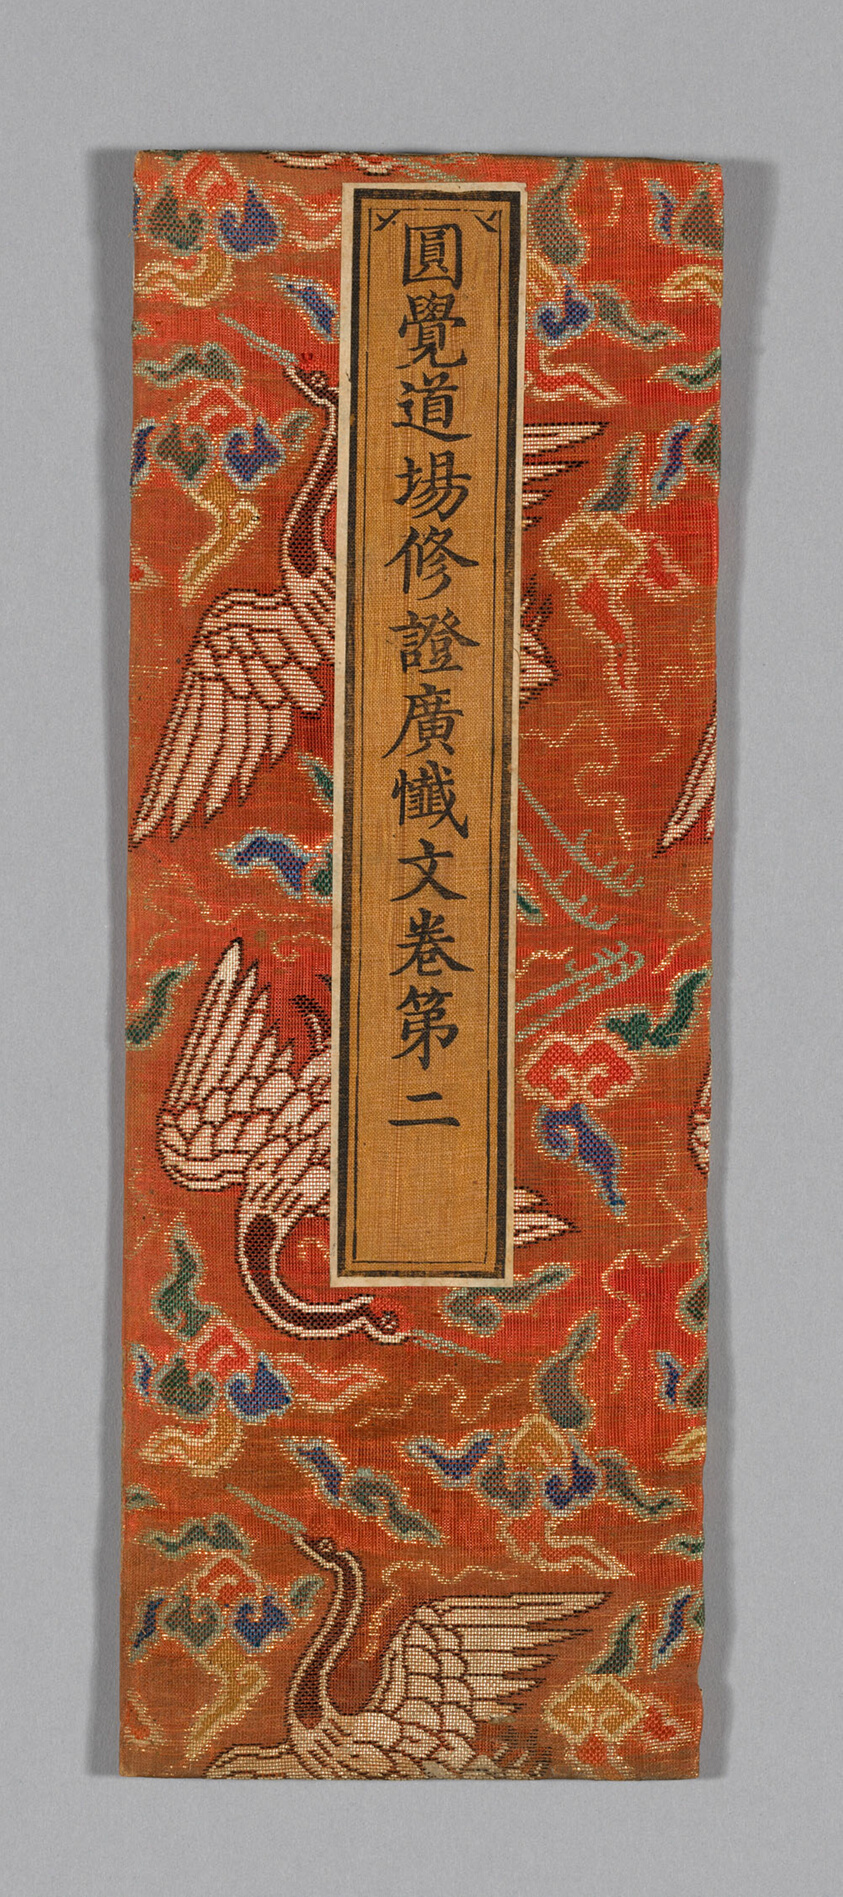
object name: Textile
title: Sutra Cover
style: ming, Chinese (culture or style), East Asian, asian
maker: China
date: Ming dynasty (1368–1644), c. 1590s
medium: Silk and gold-leaf-over-lacquered paper, plain weave with patterning wefts; wrapped over cardboard and backed with paper; applied label of silk, plain weave; with inscribed title painted and/or printed with ink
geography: China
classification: textile; weaving